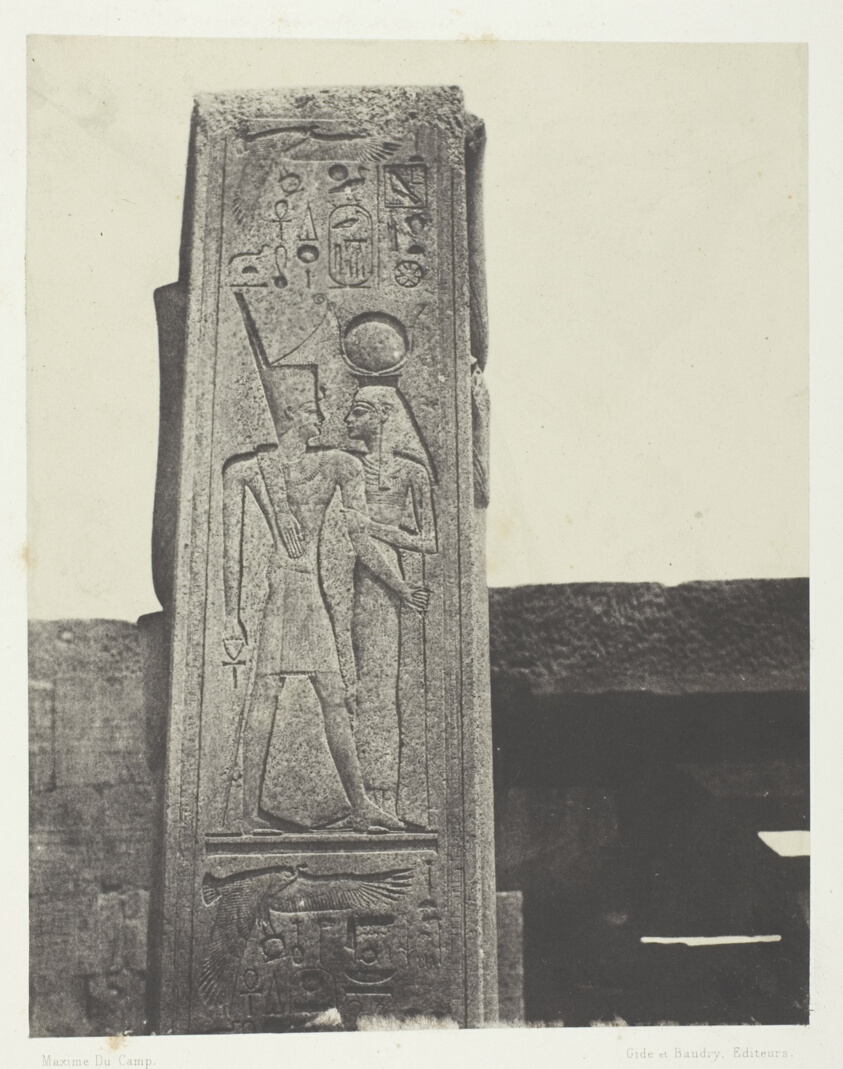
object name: Photograph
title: Palais de Karnak, Pilier Devant le Sanctuaire de Granit; Thèbes, plate 39 from the album "Egypte, Nubie, Palestine et Syrie" (1852)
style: 19th century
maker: Maxime Du Camp (French, 1822–1894)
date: 1849/51, printed 1852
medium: Salted paper print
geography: France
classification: salted paper print; photographic process; photography; photograph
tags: Collected by Hugh Edwards, Egypte, Nubie, Palestine et Syrie